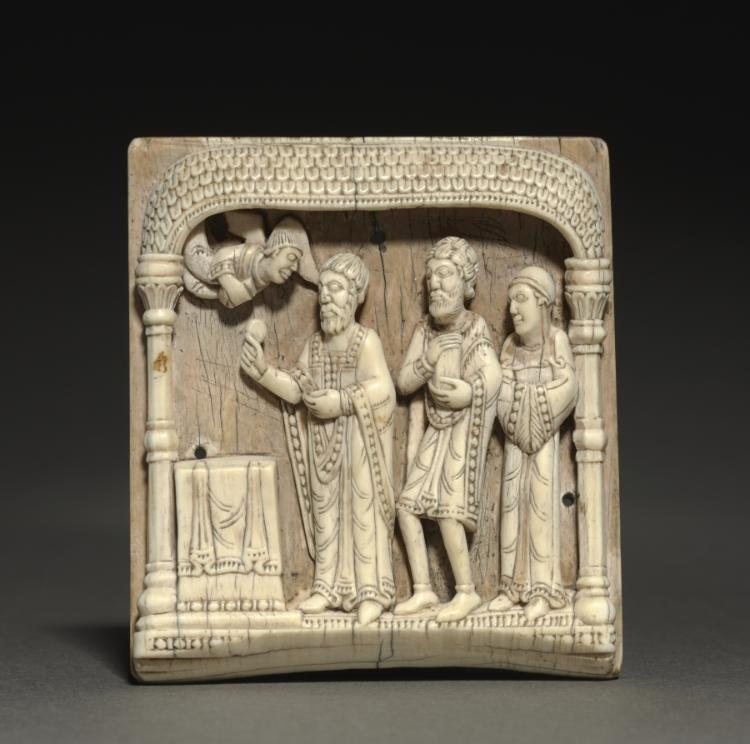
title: Plaque from a Portable Altar: Zacharias at the Altar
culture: Germany, Rhine Valley, Cologne?, Romanesque period, 12th century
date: c. 1100–1125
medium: ivory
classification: Ivory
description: This delicate ivory plaque may once have decorated a side of a portable altar. It likely depicts the angel of the Lord appearing to the priest Zacharias, the father of John the Baptist, at the altar in the temple. Like the identity of the object in Zacharias’s hands, the identity of the couple accompanying the priest remains unclear.